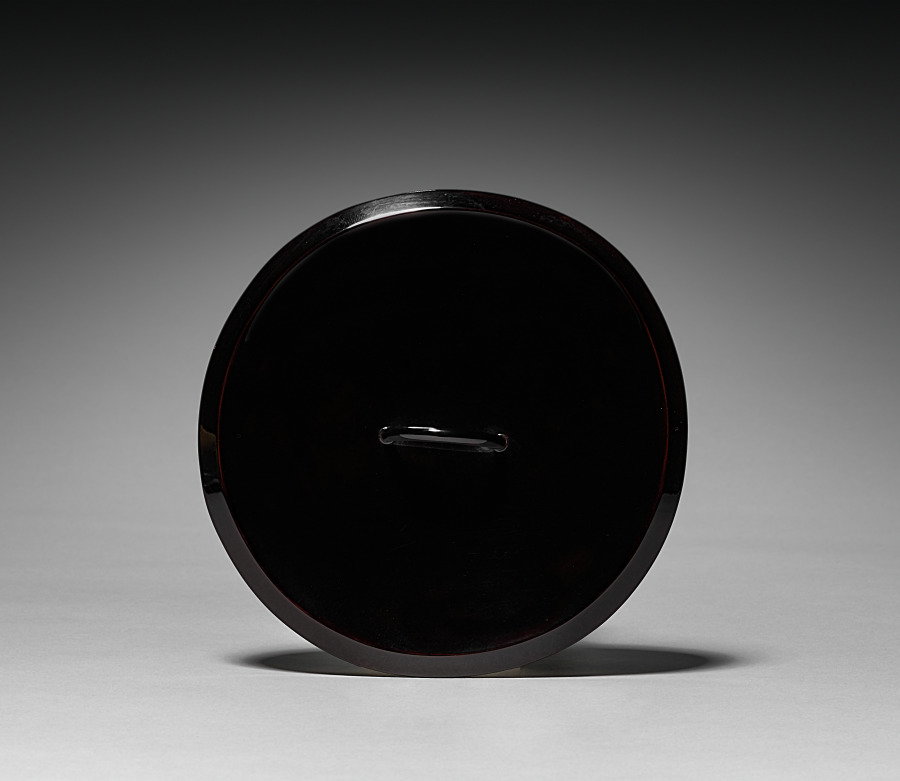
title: Water Container (Mizusashi) with Riverscape (lid)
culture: Japan, Momoyama period (1573-1615) to Edo period (1615-1858)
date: late 1500s–early 1600s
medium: Black lacquer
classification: Ceramic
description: Mizusashi are jars used to hold water for the preparation of tea at tea gatherings. This one was produced in the Mino area of present-day Gifu prefecture in central Japan, and is considered one of the finest of its type in existence, based on the complex aesthetic sensibilities developed around the tea ceremony in Japan. It is called a “picture Shino” (e-shino) mizusashi, as it has an abstracted design said to resemble an ink painting of reeds along a river bank and small boats in a river on one side, and a geometric pattern on the other. With its irregular shape and thick, luminous glaze, it is of a variety favored by eminent tea masters of the Momoyama period.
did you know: The water this container held during a tea ceremony was used to fill the kama, or iron pot in which the water is heated.